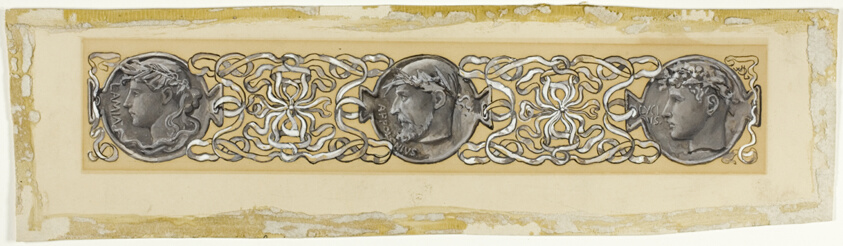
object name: Drawing and Watercolor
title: What Wreath for Lamia? What for Lycius? What for the Sage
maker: Will Hicock Low (American, 1853-1932)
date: 1885/88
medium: Black, gray and white gouache on cream card (discolored to tan)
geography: United States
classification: drawings (visual works); prints and drawing